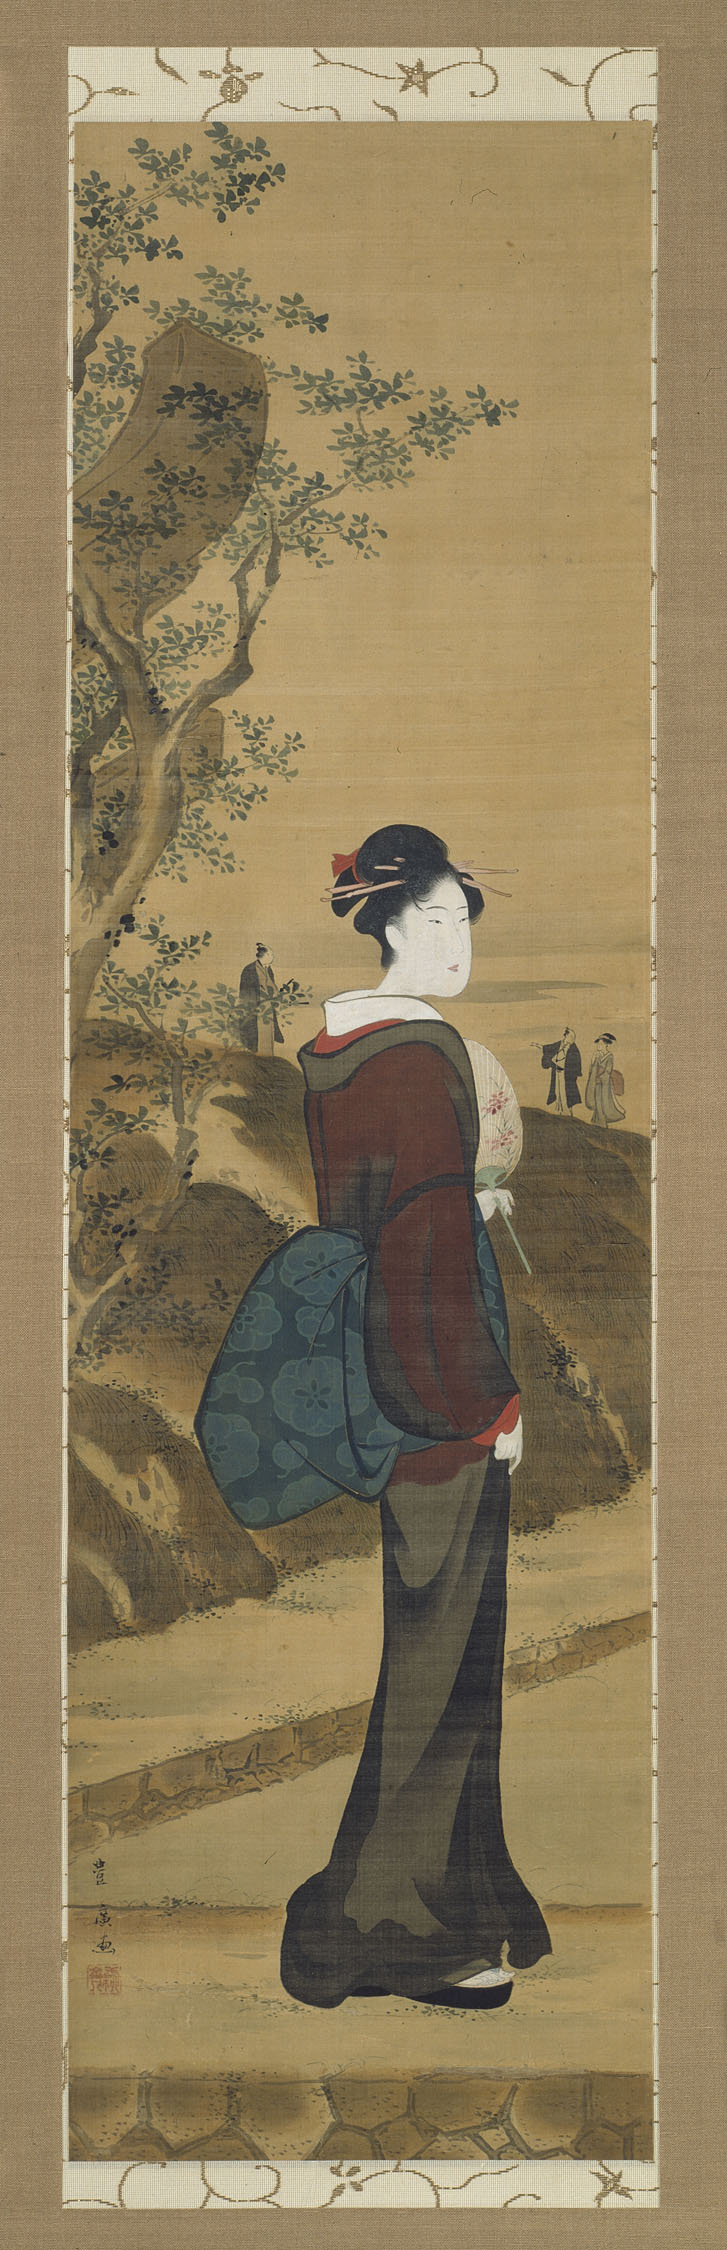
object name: Painting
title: Beauty at the Mimeguri Shrine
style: Japanese (culture or style)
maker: Utagawa Toyohiro (Japanese, 1773-1828)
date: Edo period, Bunka era c. 1804/18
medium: Hanging scroll; ink, colors and gold pigment on silk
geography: Japan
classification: hanging scroll; painting; asian art